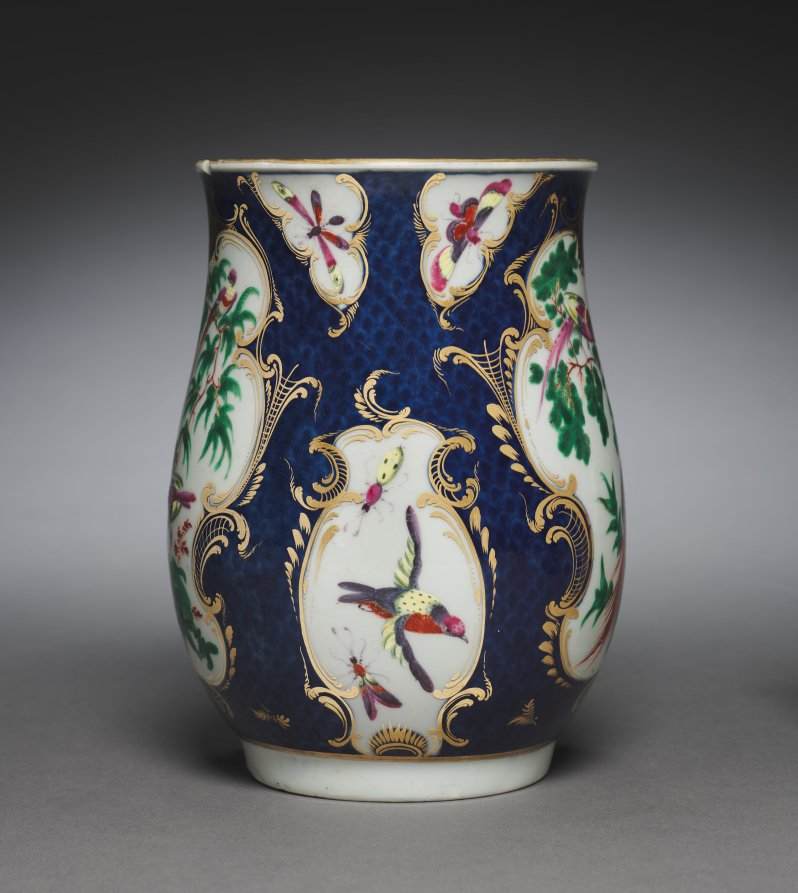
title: Tankard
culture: England, 18th century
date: c. 1770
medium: ceramic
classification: Ceramic